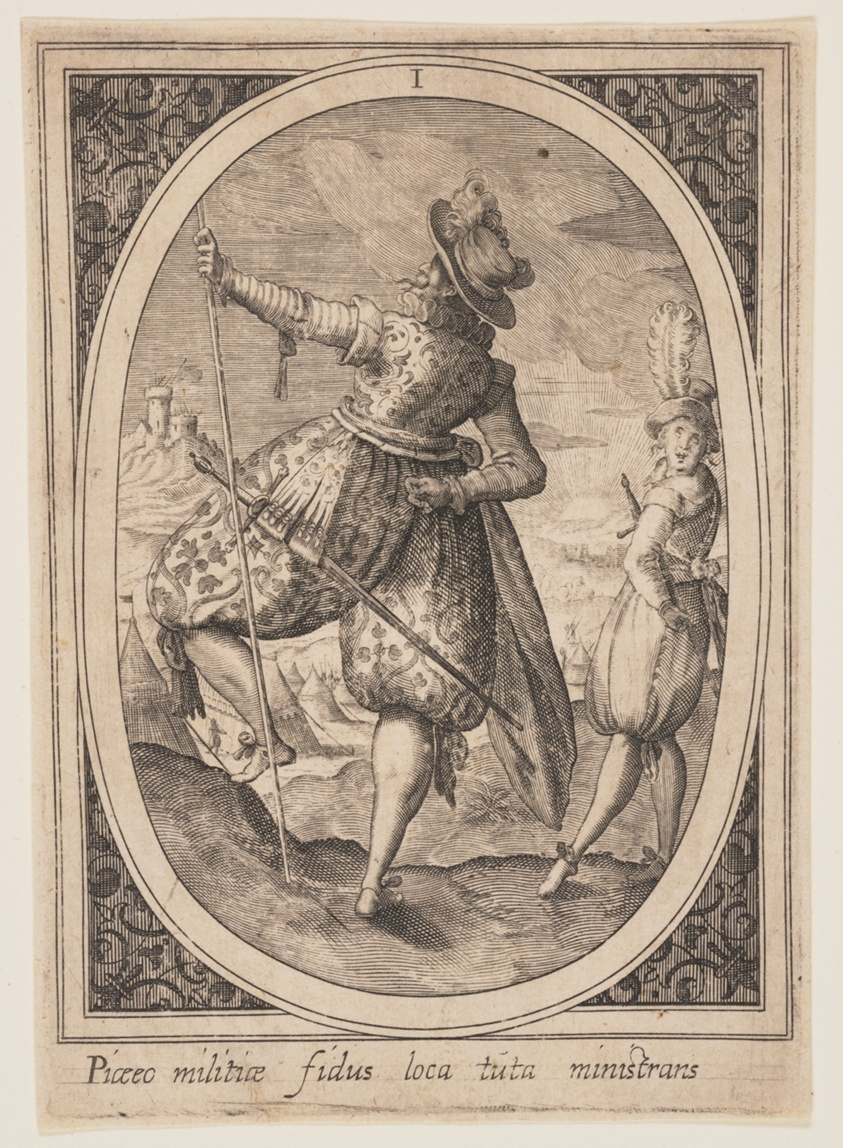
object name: Print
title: Plate 1 from Military Figures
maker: Attriuted to Heinrich Ulrich (German, c. 1572-1621); possibly after Paul Mair (German, active c. 1600)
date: c. 1590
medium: Engraving on ivory laid paper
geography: Germany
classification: engraving; paper; print; prints and drawing